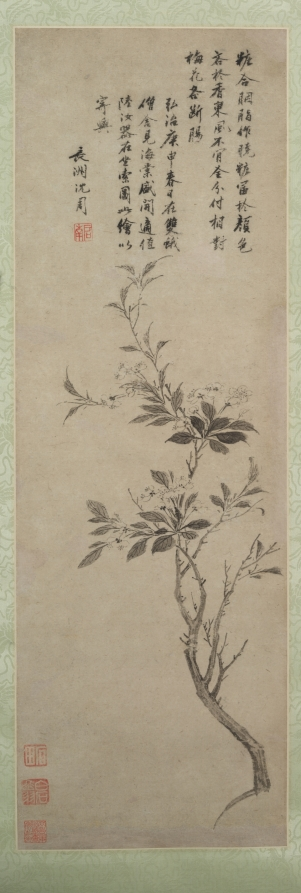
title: Flowering Crab Apple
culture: China, Ming dynasty (1368–1644)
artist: Shen Zhou (Chinese, 1427–1509)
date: 1500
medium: hanging scroll, ink on paper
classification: Painting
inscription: 粧[粉]合胭脂作曉粧，富於顔色吝於香。 東風不肯全分付，相對梅花各斷腸。 弘治庚申春日, 在雙蛾僧舍見海棠盛開, 適值陸汝器在坐索圖, 此繪以寄興。 長洲沈周 [印]啟南; 石田; 白石翁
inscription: 1 additional seal of Wu Yun 吳雲 (1811-1883).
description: Shen Zhou painted a broken branch (zhezhi 折枝) of crab apple, a fragment of nature rather than the full plant in its natural context. Shen uses calligraphic outlines in pure ink to depict the flower petals. The swift yet precise brushstrokes together with the slight S-shaped branch convey vitality. The inscription is a poem written by the artist, commenting on the lovely color and melancholic aura of the crab apple blossom. Shen Zhou is the founder of the Wu School, a group of scholars and officials active around Suzhou in eastern China, known for practicing painting and calligraphy in a refined and elegant style.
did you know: Shen Zhou painted this is an informal and rapidly done presentation picture when he was 74 years old.